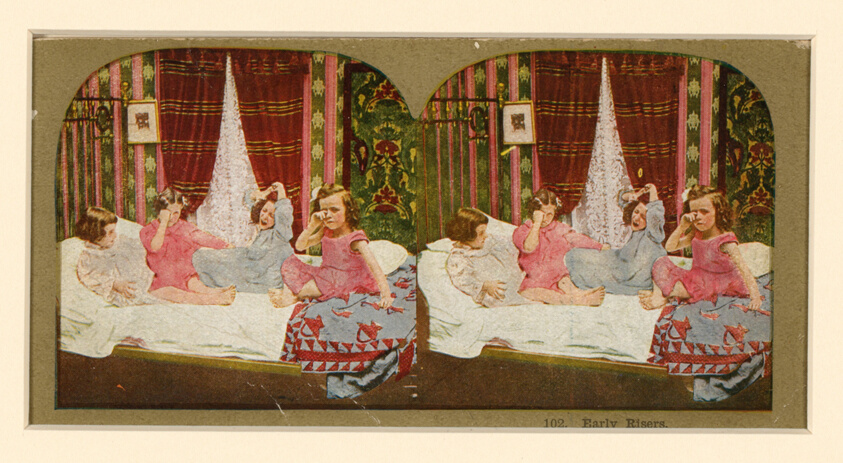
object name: Photograph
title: Early Risers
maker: United States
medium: photograph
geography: United States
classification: textile; accessories (object genre); photograph; photography